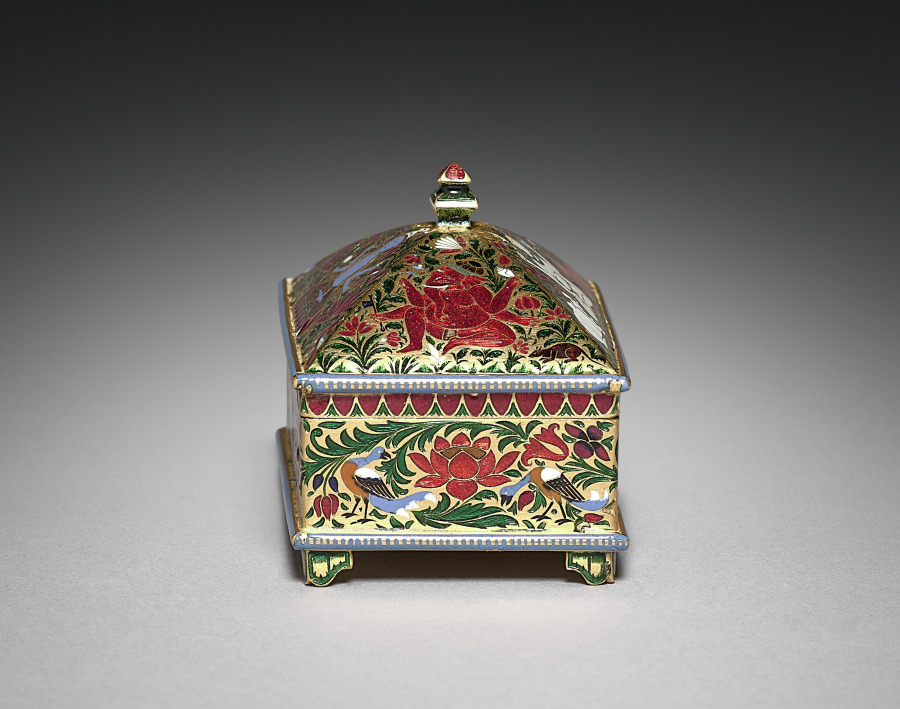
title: Box decorated with Shiva, Vishnu, Krishna, and Ganesha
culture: Northwestern India, Rajasthan, Rajput Kingdom of Jaipur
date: c. 1800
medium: gold with enamel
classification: Metalwork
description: This box is covered in a variety of birds, animals, and plants. The central motifs on the lids include images of four Hindu gods: Shiva, Krishna, Vishnu, and Ganesha. The blue figures are Vishnu and Krishna, the latter of which is an incarnation of the former who is shown playing a flute. The elephant-headed Ganesha is red and accompanied by his mount, the bandicoot rat Dinka. The four-armed Shiva is paired with two animals, including a tiger and his sacred bull mount Nandi. Small enamel boxes could be used to house many different substances, from cosmetics to spices to stimulants, including opium and paan, a digestive typically given at formal gatherings as a sign of the host’s hospitality.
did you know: Shiva’s mount is the bull; the tiger is the mount of his wife.